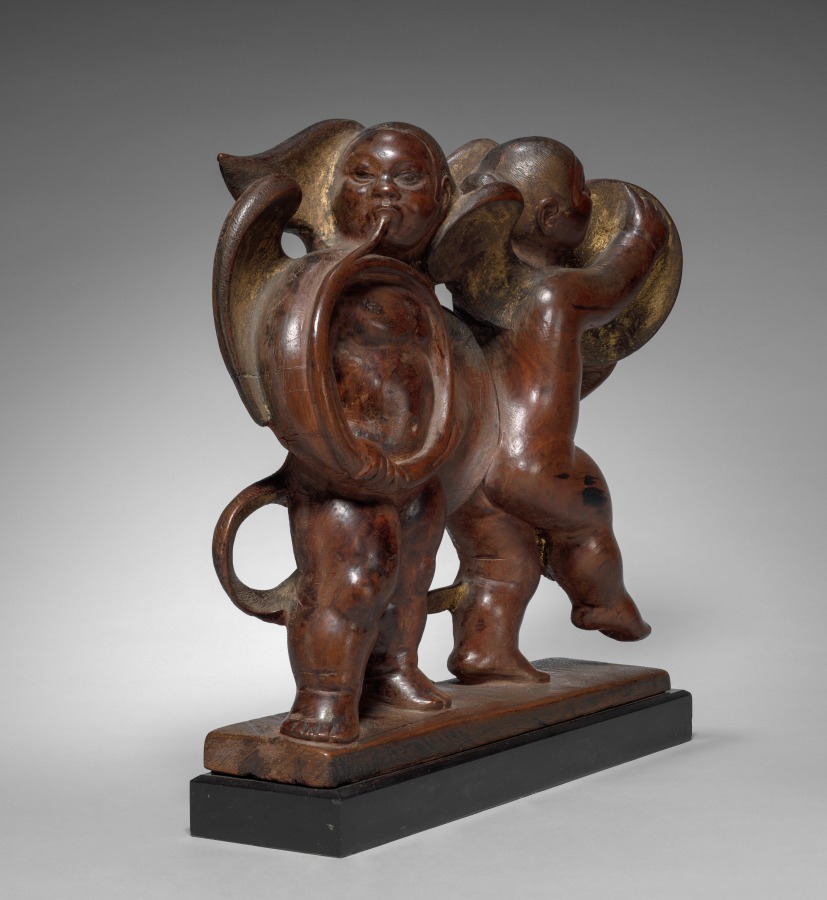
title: Dancing Children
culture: America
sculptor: Gaston Lachaise (American, born France, 1882–1935)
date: 1923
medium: wood with traces of gilt and polychrome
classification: Sculpture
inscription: Signed on right end of base: G. LACHAISE 1923